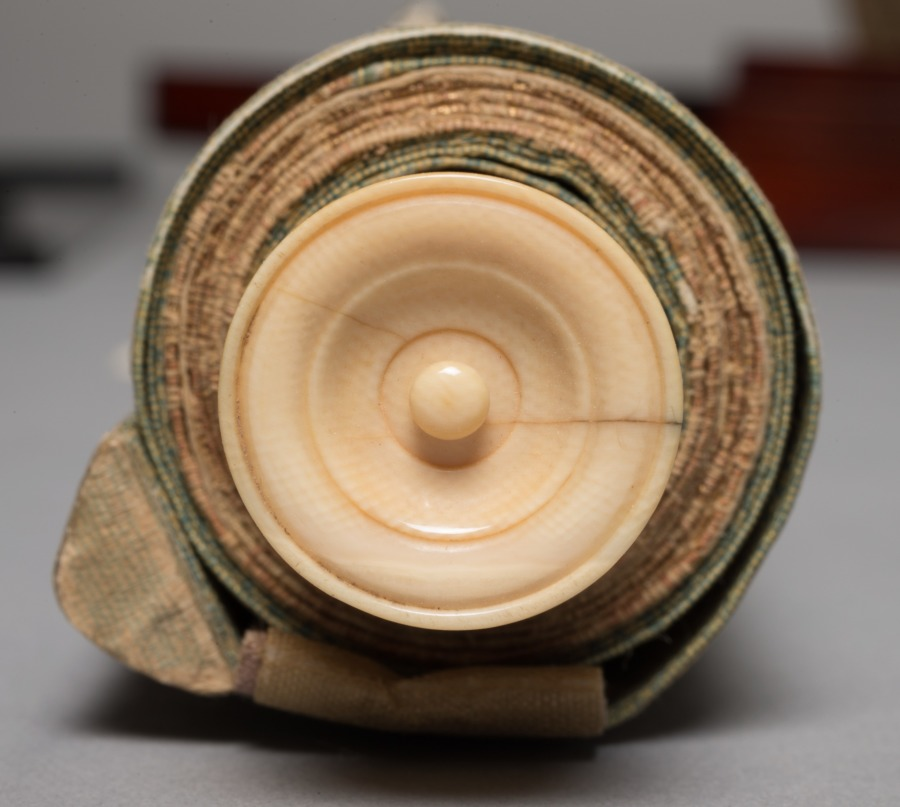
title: Crow on a Pomegranate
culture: Japan, Muromachi period (1392–1573)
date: 1500s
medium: hanging scroll; ink on paper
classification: Painting